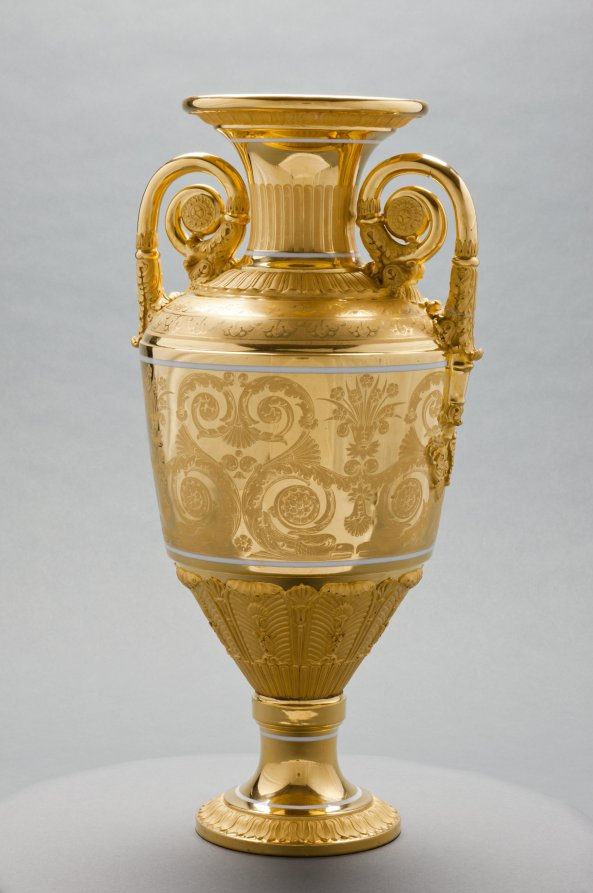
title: Vase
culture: Russia, St. Petersburg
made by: St. Petersburg Imperial Porcelain Factory (Russian)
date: c. 1820–1830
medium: gilt porcelain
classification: Ceramic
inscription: inscribed: "Moreau" in gold near lip.